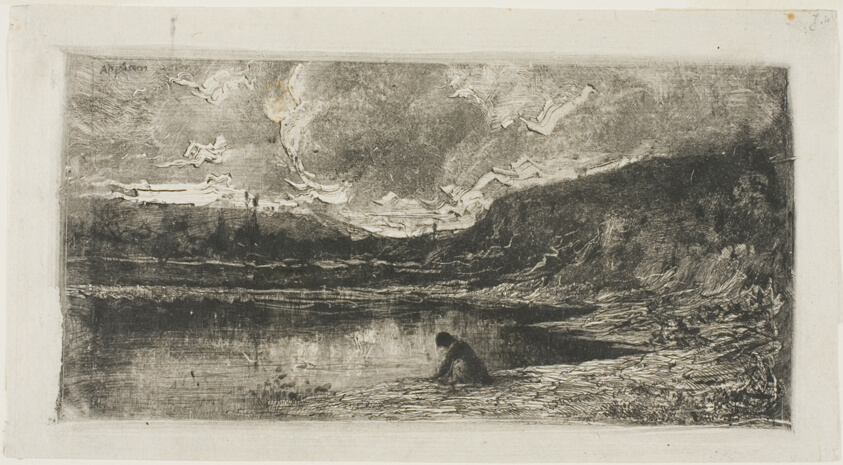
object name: Print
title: A Cliff in the Parish of Rix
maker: Adolphe Appian (French, 1818-1898)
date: 1862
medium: Monotype on off-white China paper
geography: France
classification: monotype; print; prints and drawing